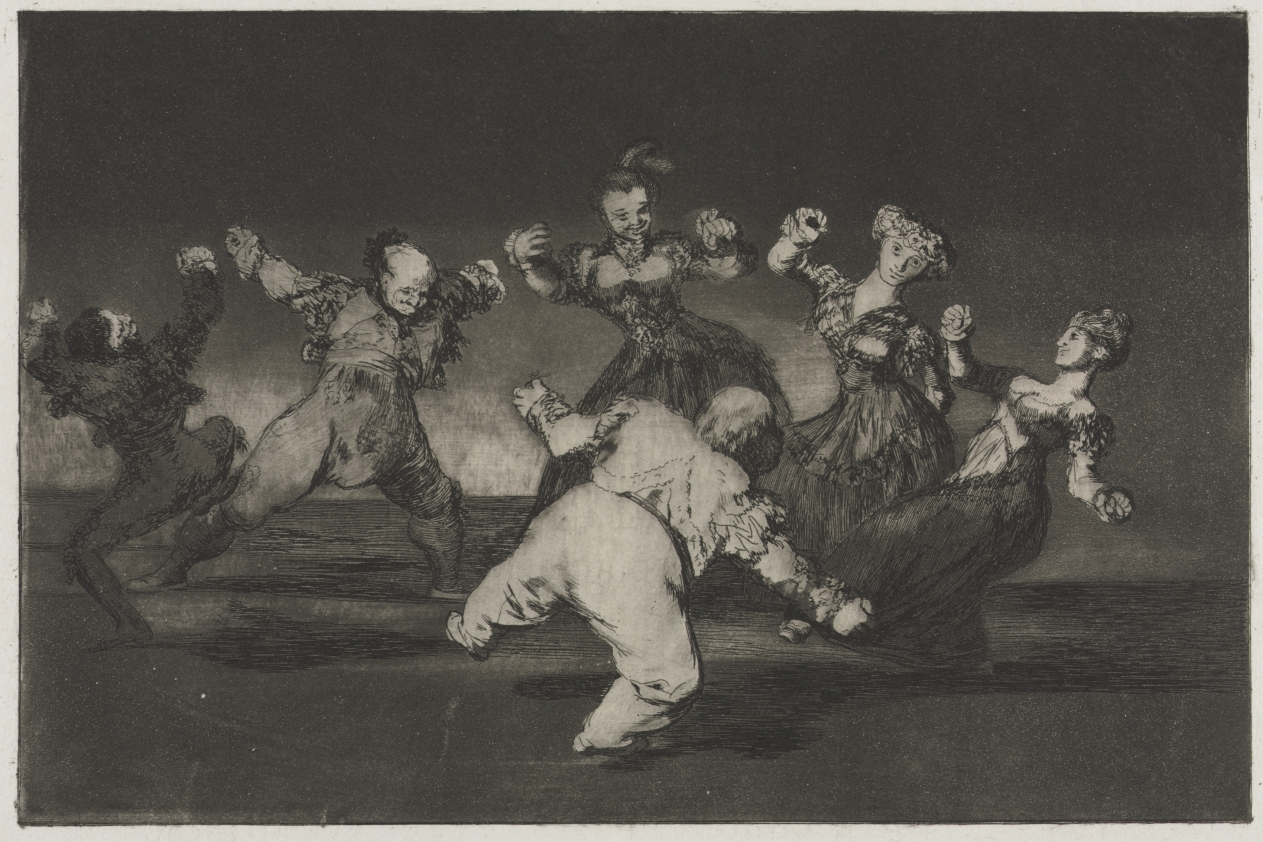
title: The Proverbs: If Marion Will Dance, Then She Has to Take the Consequences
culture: Spain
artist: Francisco de Goya (Spanish, 1746–1828)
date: 1864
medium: etching and aquatint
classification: Print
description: The freewheeling, lascivious dancers in Goya’s composion keep time with castanets, pairs of shell-shaped wooden clappers attached to the thumb and index finger. The erotic connotations of castanets dated from antiquity, when they were depicted in vase paintings in association with the cult of the goddess Cybele and the Dionysian rites. According to Martin Mersenne’s treatise, Les Preludes de l’harmonie universelle (1636), castanets were used to accompany the saraband, a fast folk dance considered disreputable in 16th-century Spain. Although by the time the saraband reached the French court in the 17th century, it had become a slow, serious, processional dance, Goya refers here to the dance’s earlier, erotic origins.